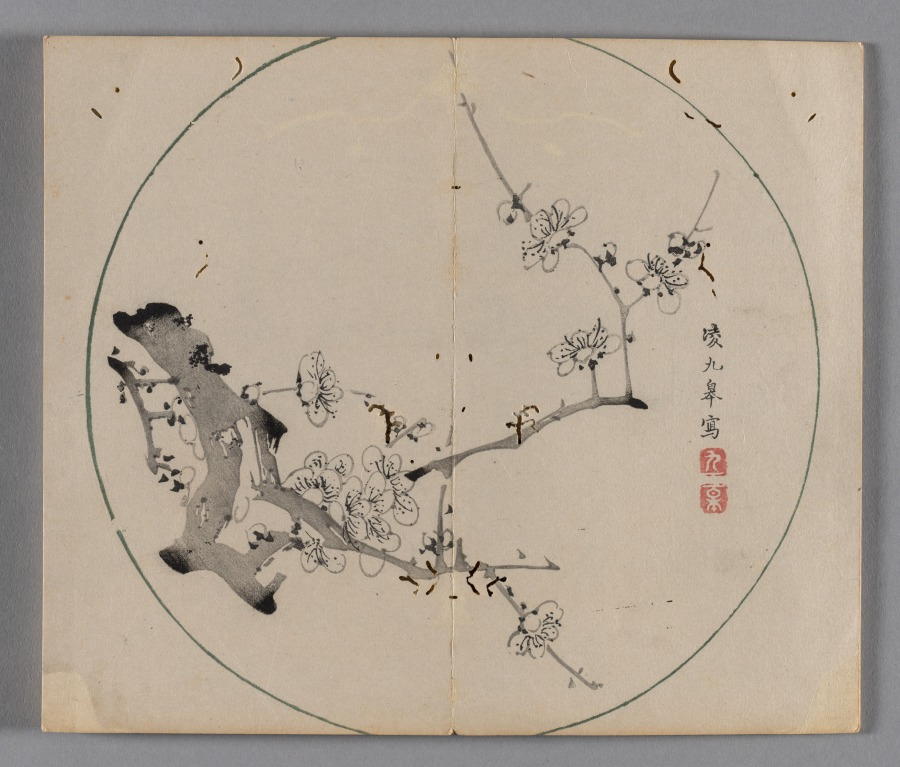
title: Ten Bamboo Studio Painting and Calligraphy Handbook (Shizhuzhai shuhua pu): Round Fans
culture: China, Qing dynasty (1644-1911)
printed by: Hu Zhengyan (Chinese, c. 1584–1674)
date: 1633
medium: Woodblock-printed book; ink and colors on paper; first edition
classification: Print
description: Color printing reached a level of perfection in the early 1600s, as seen in this Ten Bamboo Studio Collection of Calligraphy and Painting and the Mustard Seed Garden Manual of Painting (printed 1679 and 1701). The painterly quality, precision in registering (aligning) the woodblocks, and harmonious colors made them the most successful color print editions in Chinese history. Both editions were printed and compiled in Nanjing, spread nationwide, and had a great impact on the arts in Japan and Korea.